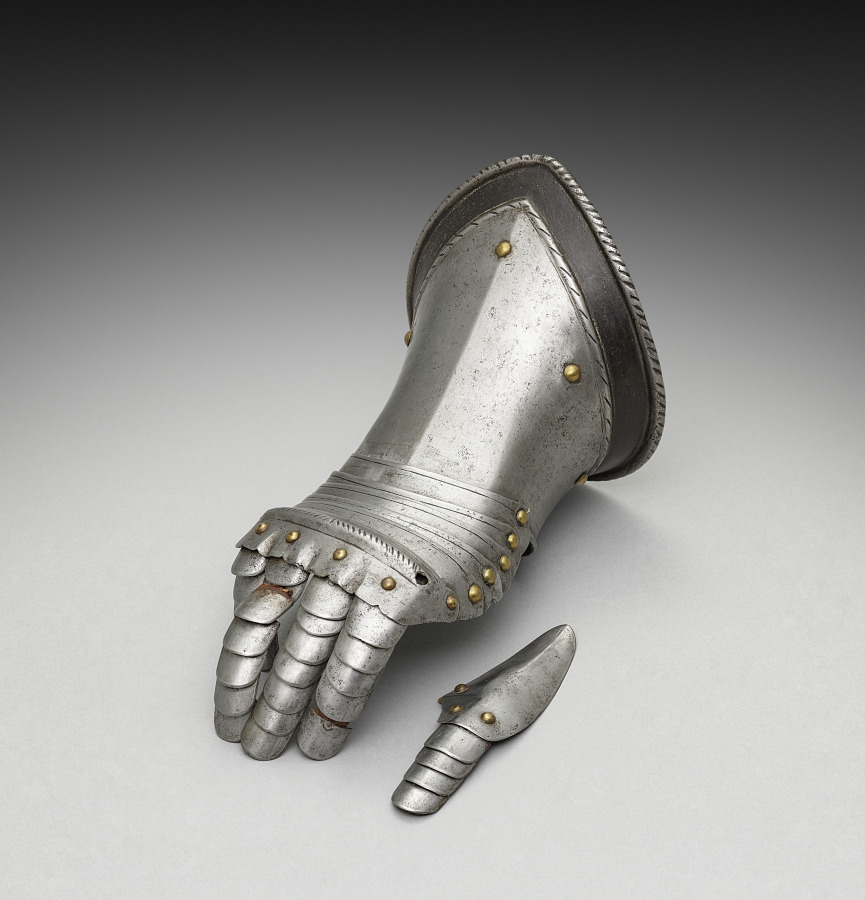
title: Right Gauntlet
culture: Germany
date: c.1550–1570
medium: iron, steel, leather and brass rivets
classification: Arms and Armor